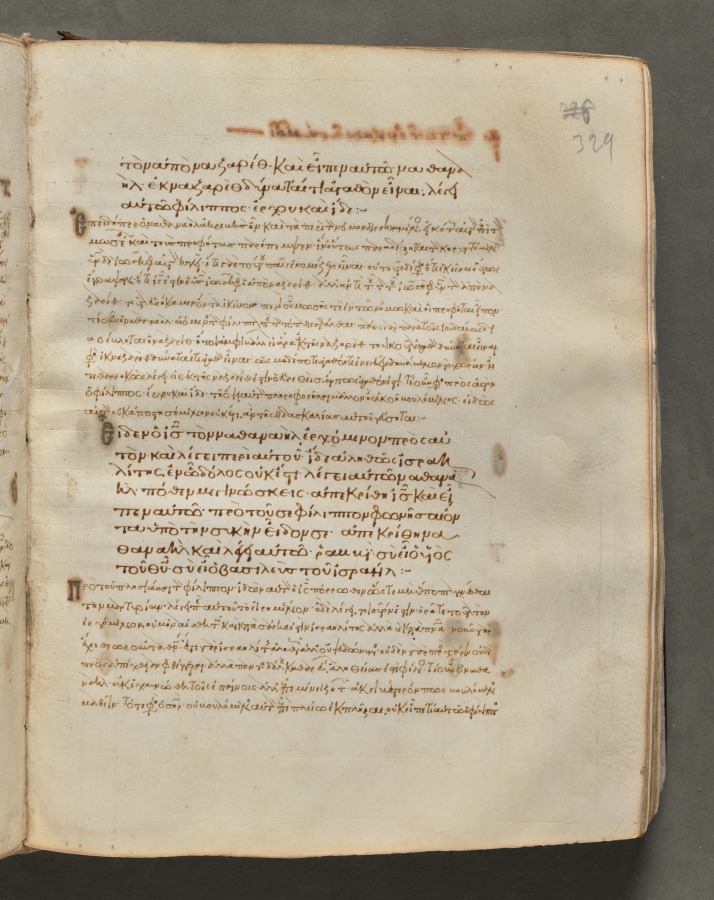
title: Text, folio 329 (recto), from a Gospel Book with Commentaries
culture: Byzantium, Constantinople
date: c. 1000–1100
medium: ink, tempera, and gold on vellum; leather binding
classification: Bound Volume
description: Each of the four gospels in this book opens on a page with brilliantly illuminated borders depicting the author of the text as well as birds—principally peacocks, symbols of the immortality of the soul—and fountains, representing the fountain of life and the salvation of the soul. This volume consists of 428 leaves with texts in Greek. Its level of sophistication suggests that it was probably written and decorated in a monastery in Constantinople.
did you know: Gospel books were carried in procession through Byzantine churches.